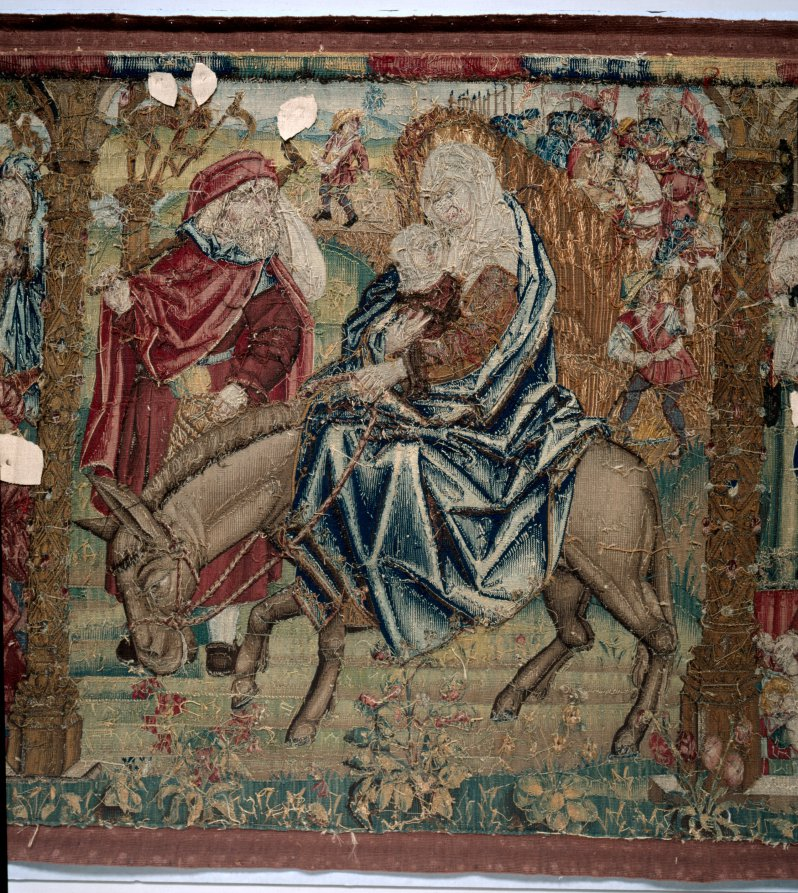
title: Altar Frontal: Scenes from the Childhood of Christ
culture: France and South Netherlands, 1500s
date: c. 1500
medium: Wool, silk, gold thread; tapestry weave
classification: Tapestry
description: Pictorial tapestries were symbols of wealth and more highly prized than paintings. Small tapestries with Christian imagery were frequently commissioned to embellish the fronts of altars. This example displays the Massacre of the Innocents, the Flight into Egypt, and Christ among the Doctors. Tapestry weave is ideal for creating narrative scenes. The technique can be compared to painting, as each colored weft (horizontal thread) is interlaced with warps (vertical thread) where needed for the pattern. As expensive investments, tapestries have the advantage of being portable and easily stored and displayed.